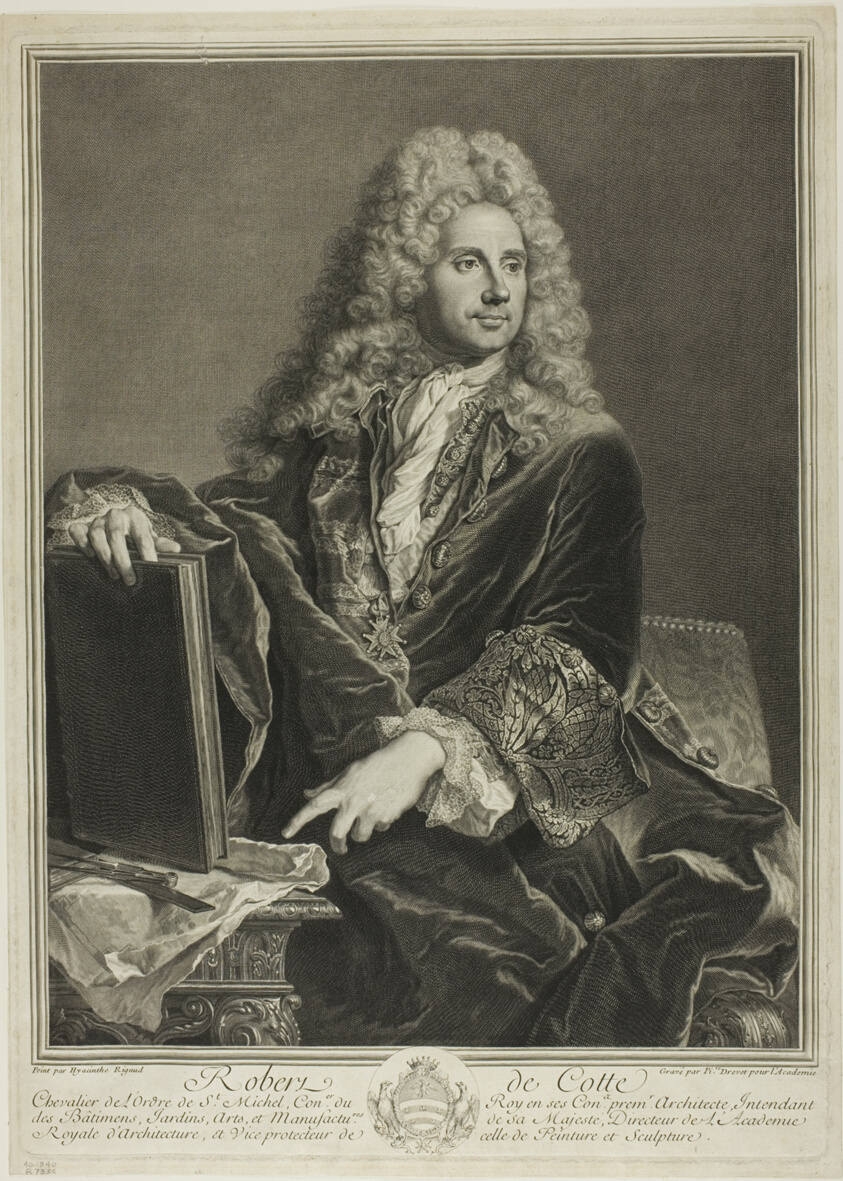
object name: Print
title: Portrait of Robert de Cotte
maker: Pierre Drevet (French, 1663-1738); after Hyacinthe Rigaud (French, 1659-1743)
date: 1722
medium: Engraving on ivory laid paper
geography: France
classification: etching; print; prints and drawing